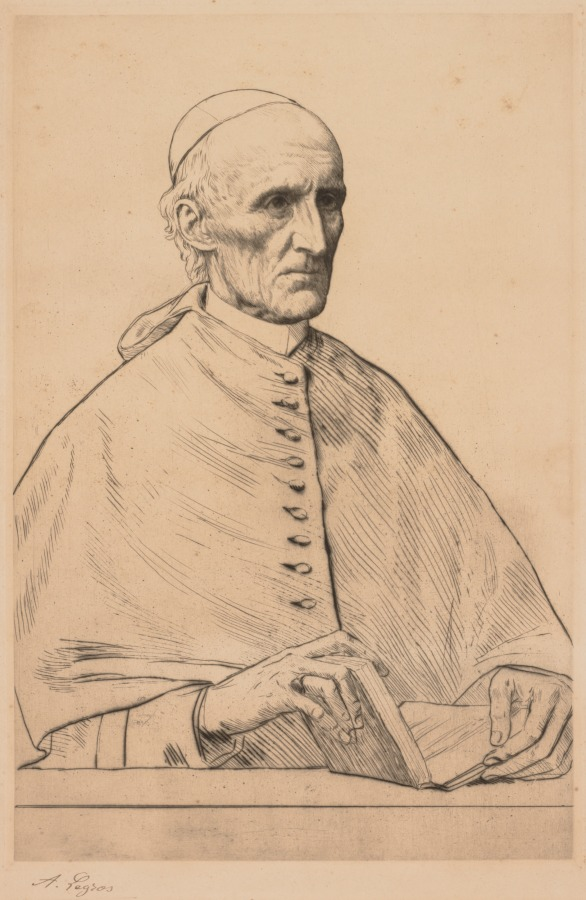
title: Cardinal Manning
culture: France, 19th-20th century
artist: Alphonse Legros (French, 1837–1911)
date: c. 1857–1911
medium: etching and drypoint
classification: Print